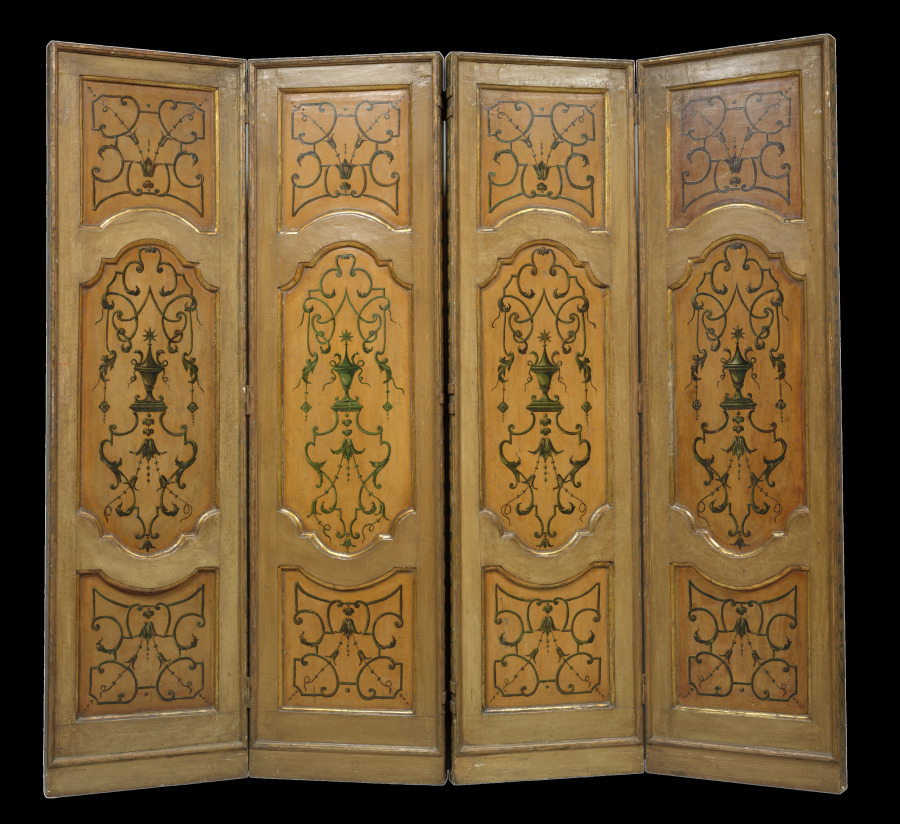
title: Four Door Panels Adapted as a Screen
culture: Italy, Florence or Luca, early 18th century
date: early 1700s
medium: painted decoration on wood; moldings, gold leaf on silver leaf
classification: Furniture and woodwork